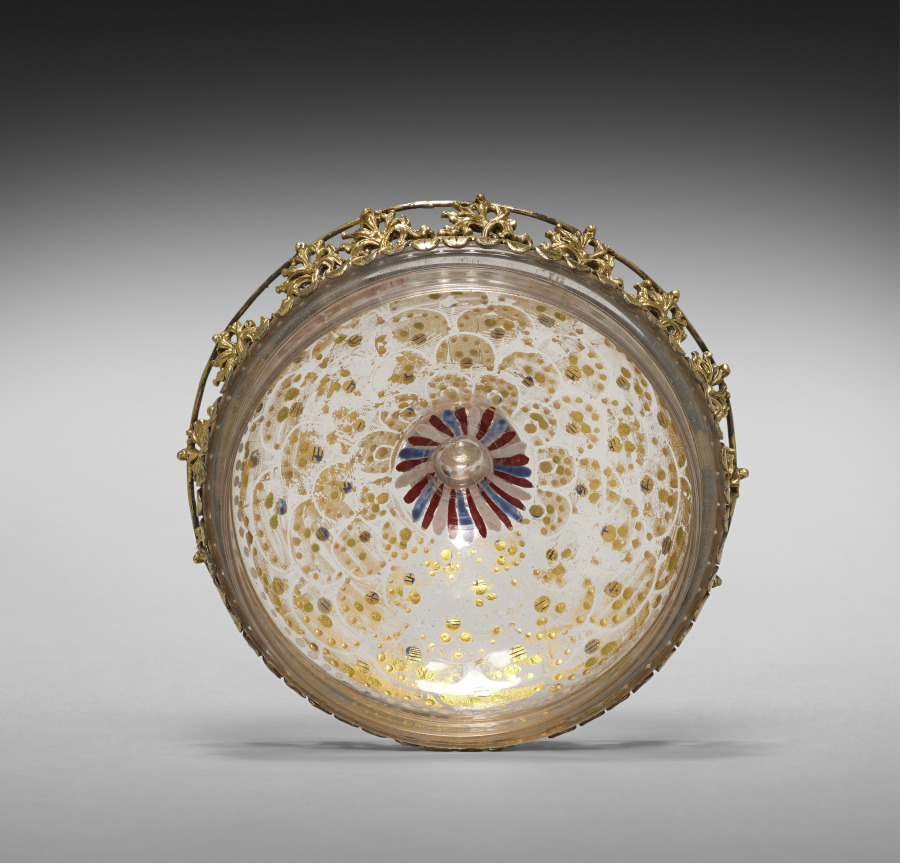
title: Cover for a Beaker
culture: Italy, Venice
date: c. 1490–1500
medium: glass, enameled and gilded, gilt-silver mounts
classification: Glass